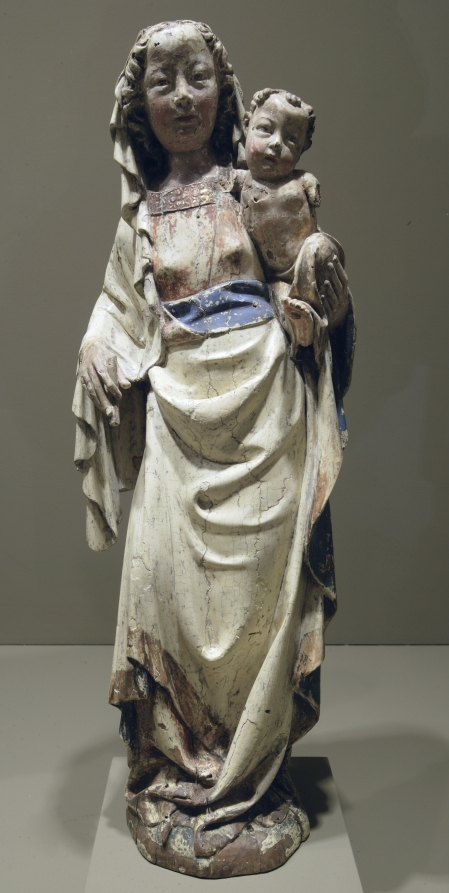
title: Virgin and Child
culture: Austria, Diocese of Passau, 14th century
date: c. 1370–1380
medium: painted lindenwood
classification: Sculpture